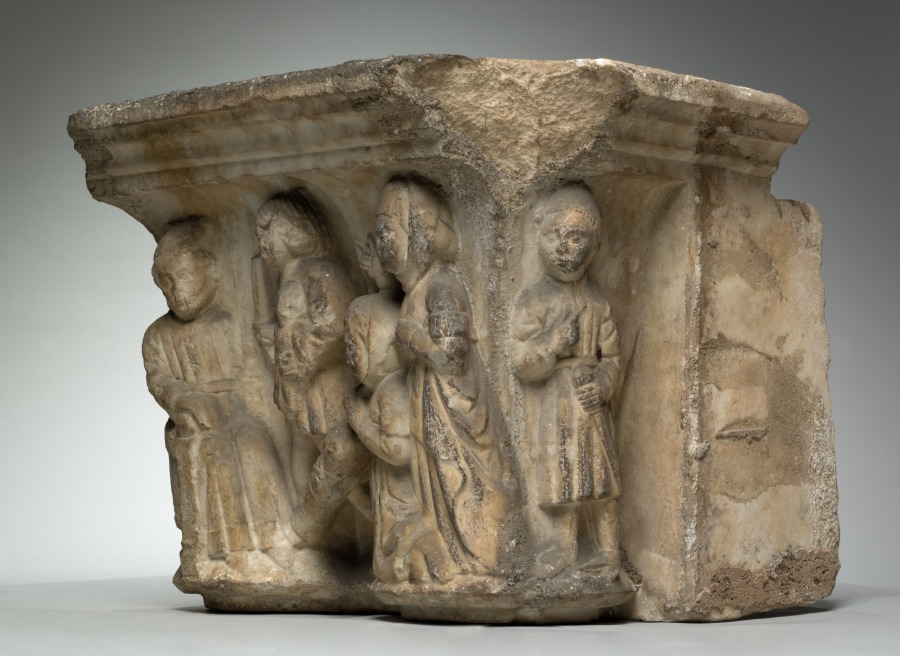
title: Engaged Capital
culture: Southern France, Abbey of Larreule, near Tarbes, 15th century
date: 1400s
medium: limestone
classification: Sculpture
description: This capital belongs to a surviving group including other architectural fragments that once decorated the cloister of the Abbey of Larreule. A cloister was a covered walkway or arcade, usually around all four sides of a square area of grass (the "cloister garth"). The seclusion of the cloister was the monks’ exclusive domain, off limits to others. Here, the monks were supposed to pray, study, meditate, and exercise in privacy and solitude. Such cloister capitals served both to instruct the monks and as a focus for their devotions. Other capitals in this series are installed in the Jardin Massey at Tarbes, near the original abbey. An arch from Larreule has been assembled with other associated French capitals at The Cloisters in New York.